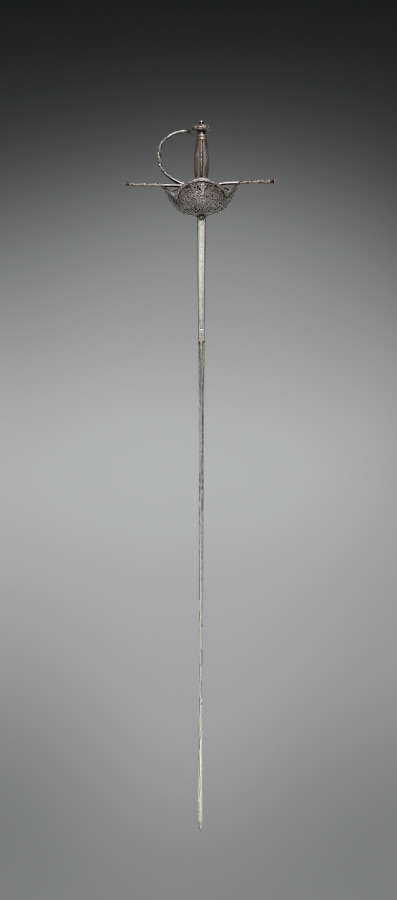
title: Cup-Hilted Rapier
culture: Spain, Toledo, 17th century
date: c. 1650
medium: Pierced and chiseled steel;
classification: Arms and Armor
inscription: PEDRO DEL MONTE/ IN TOLEDO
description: For parrying, rapiers were often made with accompanying daggers as a matched set. The aristocracy's taste for rich and intricate styles of decoration led to extravagant gilding, chiseling, piercing, enameling, and silvering. The more costly or unusual these weapons appeared, the more they were desired by the clientele who commissioned them, not only for dueling but also as the ultimate accessory.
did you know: The guard is richly decorated with chiseled and pierced arabesques, an ornamental design consisting of intertwined flowing lines.